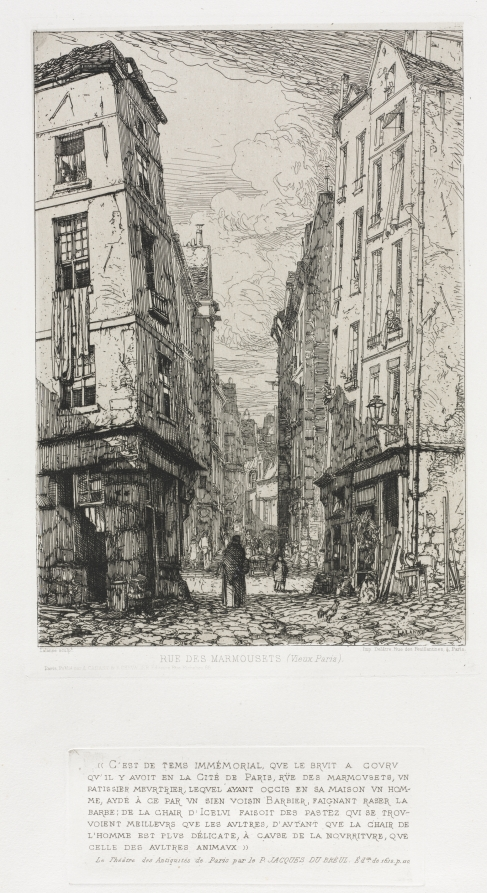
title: Rue des Marmousets (Old Paris)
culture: France, 19th century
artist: Maxime Lalanne (French, 1827–1886)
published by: A Cadart & F. Chevalier, rue Richelieu, 66 Paris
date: 1862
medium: etching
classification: Print